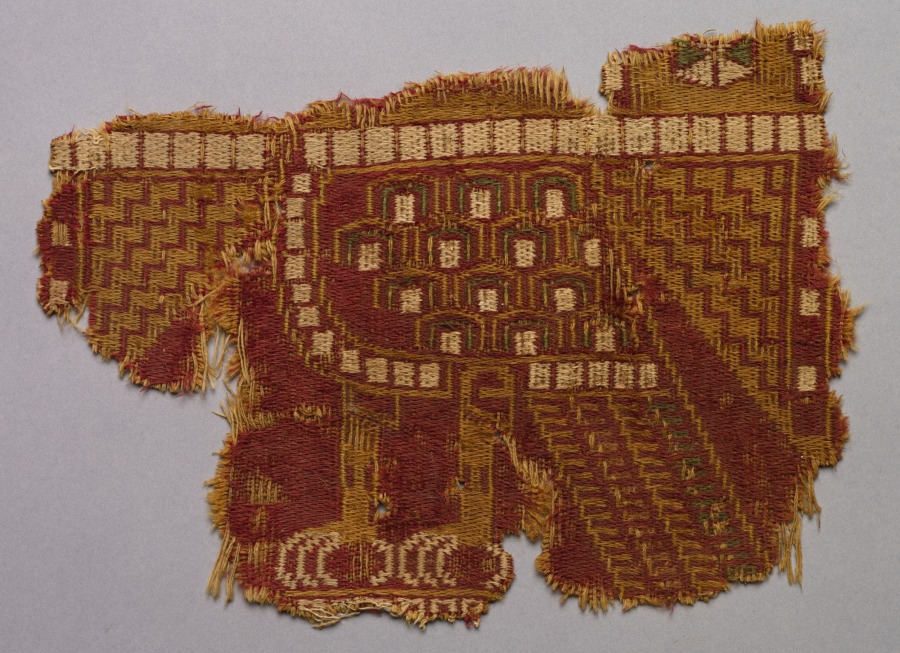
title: Fragment with headless eagle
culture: Iran, Iraq, or Syria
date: 700s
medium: samite: wool and cotton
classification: Textile